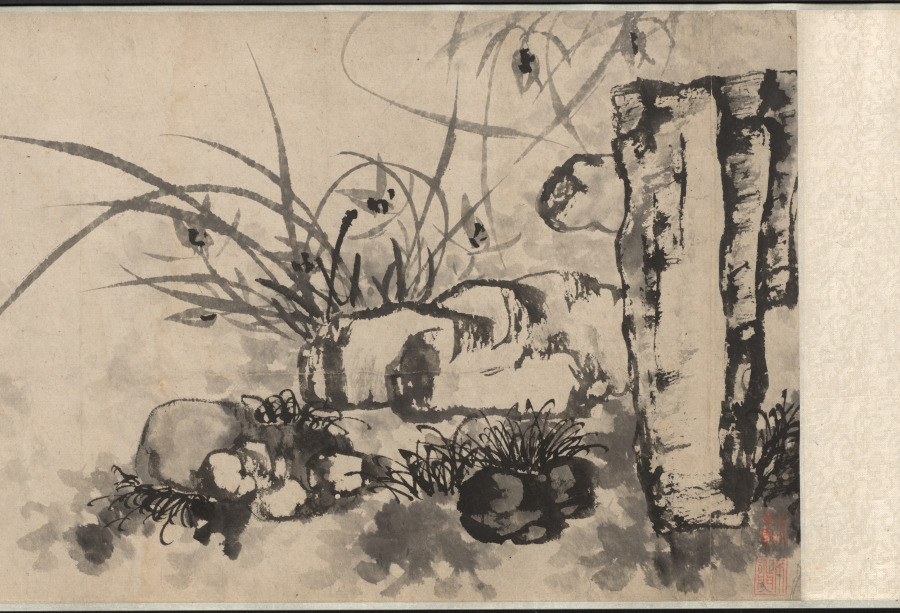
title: Rocks, Orchid, and Bamboo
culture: China, Qing dynasty (1644-1911)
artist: Shitao (Chinese, 1642–1707)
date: 1662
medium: handscroll; ink on paper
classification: Painting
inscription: Title colophon in four characters with signature and two seals on gold-flecked paper.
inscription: Artist's signature, inscription (with date of 1662), five seals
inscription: Colophon with two seals.